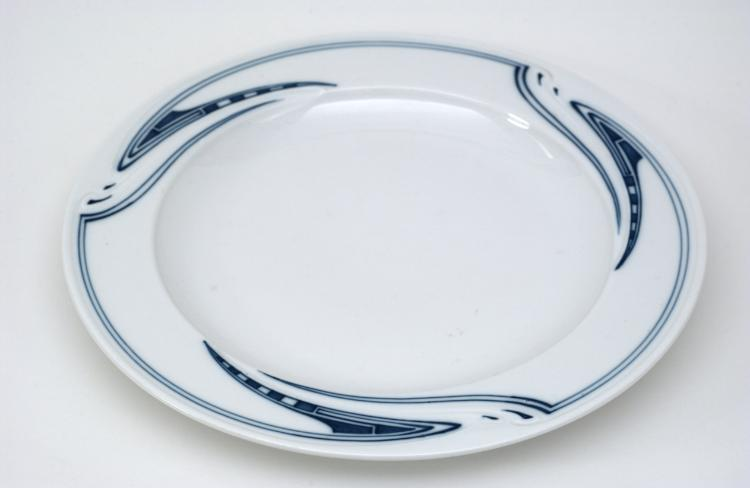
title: Plate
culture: Germany, Meissen, early 20th Century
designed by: Henry C. Van de Velde (Belgian, 1863–1957)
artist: firm of Meissen Porcelain Factory (German, est. c. 1710)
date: c. 1903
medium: porcelain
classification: Ceramic